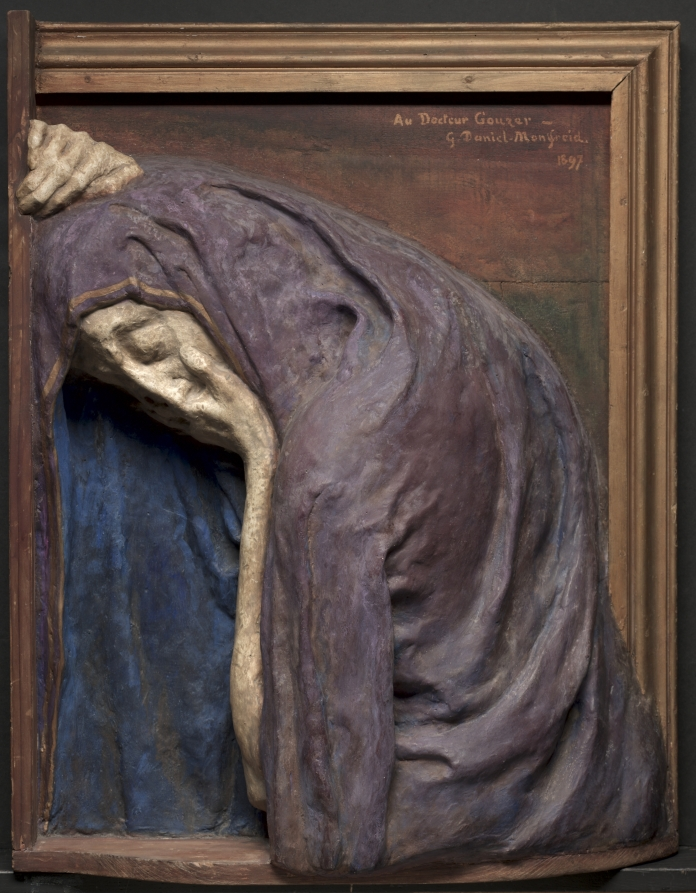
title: Mater Dolorosa (The Virgin Mary Mourning)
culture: France, 19th century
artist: Georges-Daniel de Monfreid (French, 1856–1929)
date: 1897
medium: painted plaster and wood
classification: Painting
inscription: upper left: au docteur Gouzer/G.Daniel-Monfreid.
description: This sculpture was originally part of a project for a Calvary depicting Mary Magdalene, the Virgin Mary, and Christ on the Cross; Monfreid may or may not have completed the design. He intended to execute the piece in ceramic, as suggested by the Mater Dolorosa's shadowy browns, blues, and purples that resemble ceramic glazes. The intensity of the unrealistic colors, as well as the emotional nature of the religious subject, characterizes this rare example of Nabis sculpture. Led by Paul Gauguin, Paul Serusier, Pierre Bonnard, and Édouard Vuillard during the 1890s, the Nabis—Hebrew for "prophet"—proclaimed spiritual and sacred values. They reacted against the Impressionists, who they thought were mundane and superficial. The inscription at the upper right includes the artist's signature as well as a dedication to Doctor Gouzer, a mutual friend of Monfreid and Gauguin and to whom Monfreid gave Mater Dolorosa in 1897. During his intense twelve-year correspondence with Monfreid, Gauguin praised the artist for giving the work to Gouzer, noting "Your Calvary is a true revelation: it is the masterwork of your life."